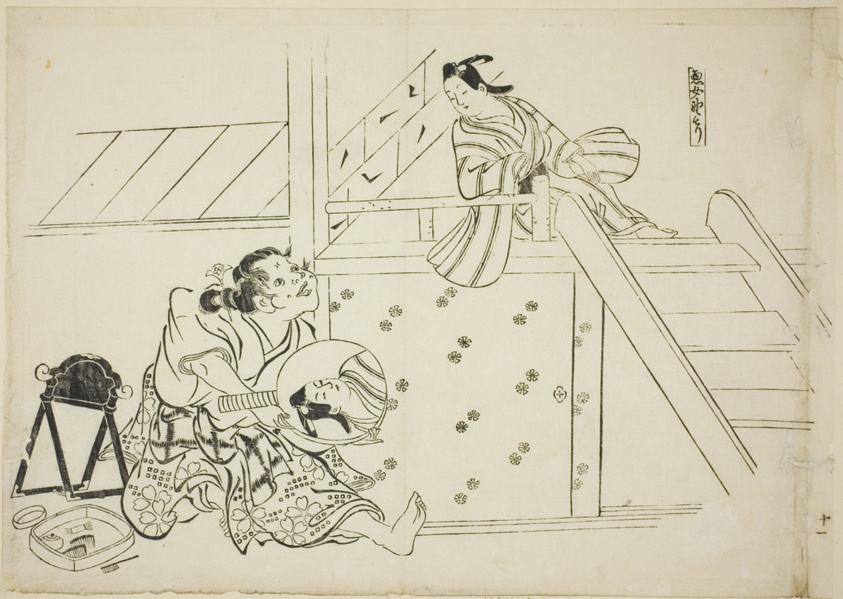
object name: Print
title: A Woman Nomori (Onna Nomori), no. 11 from a series of 12 prints depicting parodies of plays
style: Japanese (culture or style)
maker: Okumura Masanobu (Japanese, 1686-1764)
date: c. 1716/35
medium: Woodblock print; oban, sumizuri-e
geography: Japan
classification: woodblock print; print; asian art; woodblock